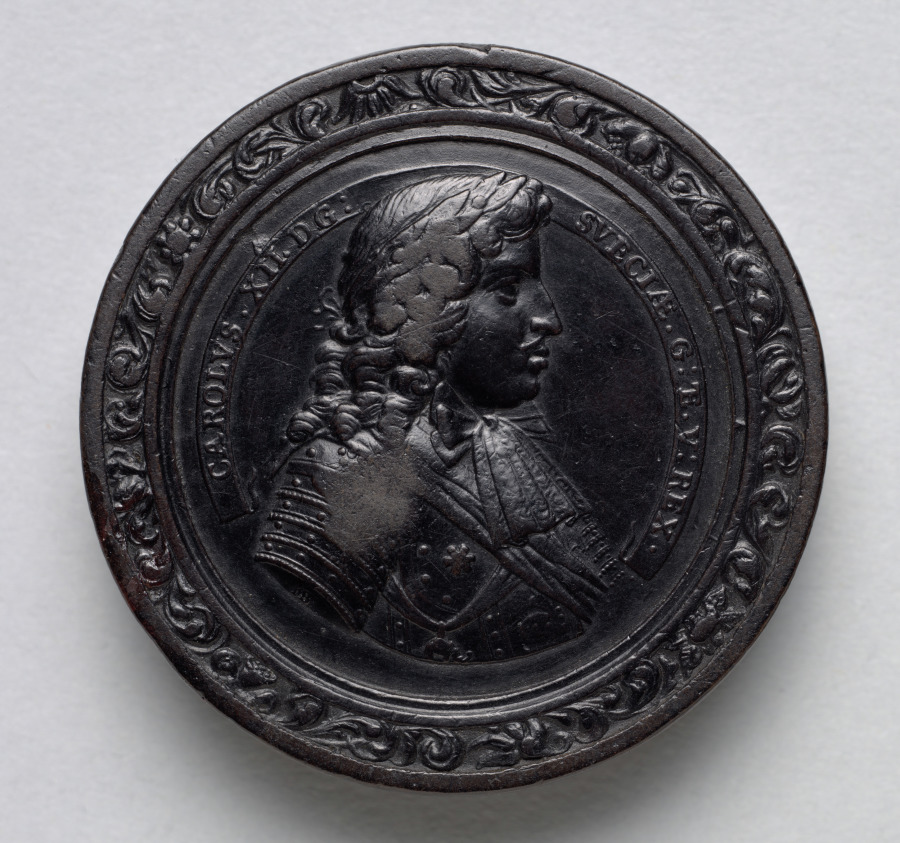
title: Gaming Piece (obverse)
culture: Germany, late 17th-early 18th Century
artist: Martin Brunner (German, 1659–1725)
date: c.1700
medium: wood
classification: Furniture and woodwork